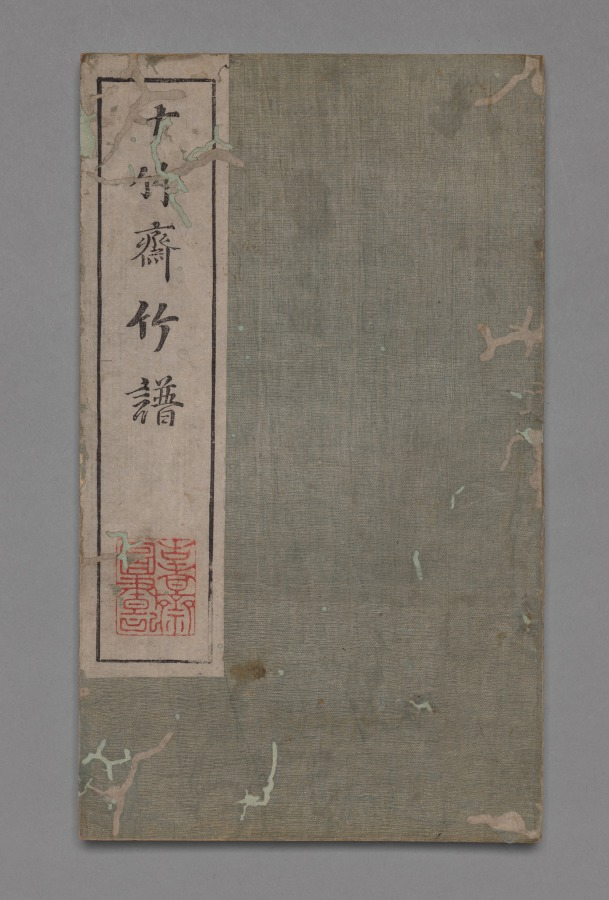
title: Ten Bamboo Studio Painting and Calligraphy Handbook (Shizhuzhai shuhua pu): Bamboo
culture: China, Qing dynasty (1644-1911)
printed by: Hu Zhengyan (Chinese, c. 1584–1674)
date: 1633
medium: Woodblock-printed book; ink and colors on paper; first edition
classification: Print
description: Color printing reached a level of perfection in the early 1600s, as seen in this Ten Bamboo Studio Collection of Calligraphy and Painting and the Mustard Seed Garden Manual of Painting (printed 1679 and 1701). The painterly quality, precision in registering (aligning) the woodblocks, and harmonious colors made them the most successful color print editions in Chinese history. Both editions were printed and compiled in Nanjing, spread nationwide, and had a great impact on the arts in Japan and Korea.